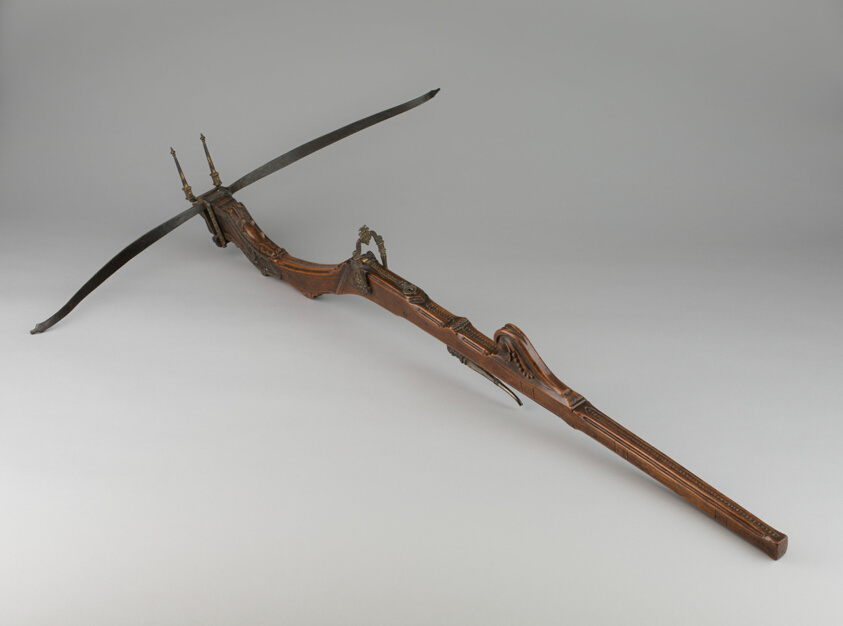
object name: Arms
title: Pellet Crossbow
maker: Italian or French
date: 1570/1600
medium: Steel, iron, gold, cherrywood, and hemp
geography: France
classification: crossbow; arms; arms and armor